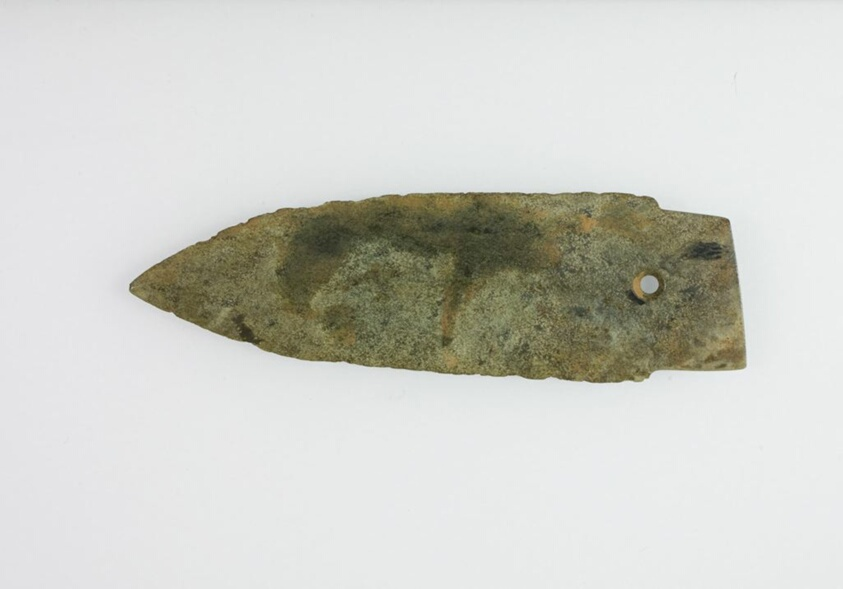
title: Dagger axe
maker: China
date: Shang dynasty (c.1600–1050 BC)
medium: Jade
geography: China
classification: jade; asian art